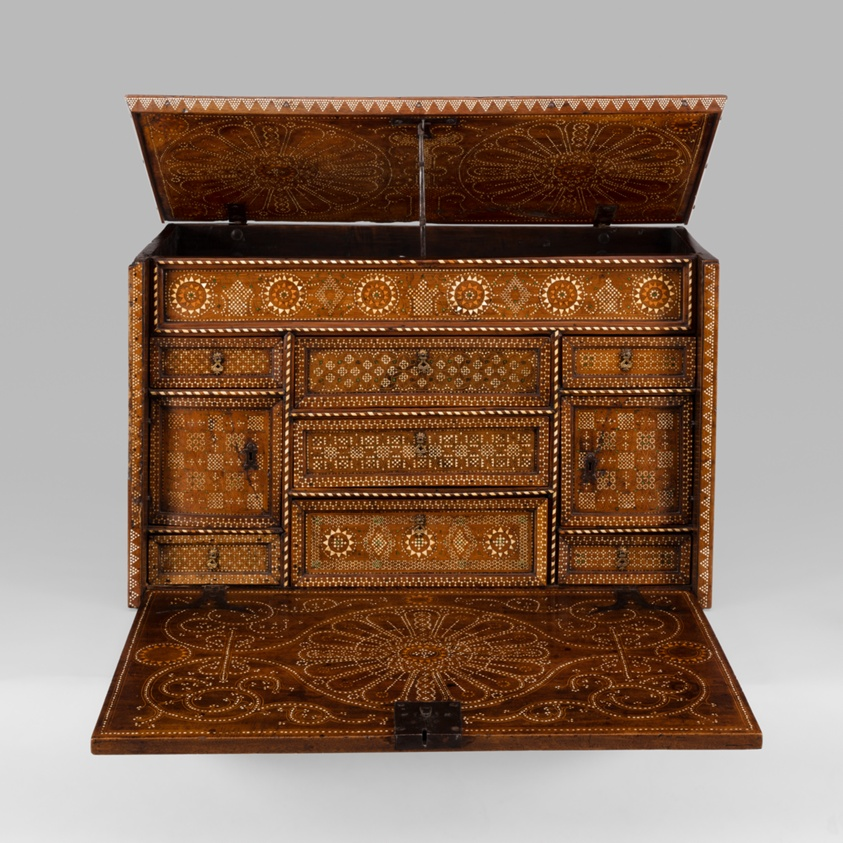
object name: Furniture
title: Writing Cabinet (Escritorio)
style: Islamic, hispano-moresque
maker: Spanish, possibly Granada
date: 1500/50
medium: Walnut, boxwood, bone, iron, copper alloy, and gilding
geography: Granada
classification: furniture; islamic; decorative arts; furnishings; furnishings (transportable); inlay; writing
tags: geometric